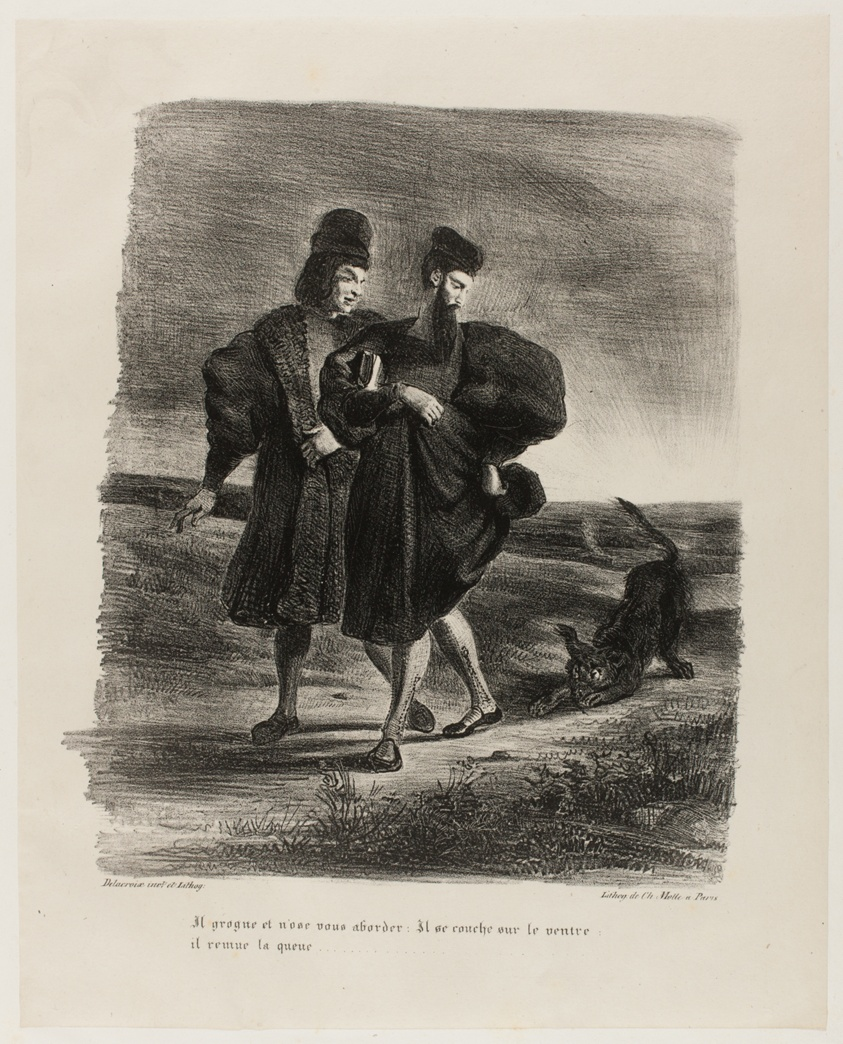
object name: Print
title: Faust, Mephistopheles and the Poodle, from Faust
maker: Eugène Delacroix (French, 1798-1863)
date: 1828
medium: Lithograph in black on ivory wove paper laid down on white wove paper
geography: France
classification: lithograph; print; prints and drawing